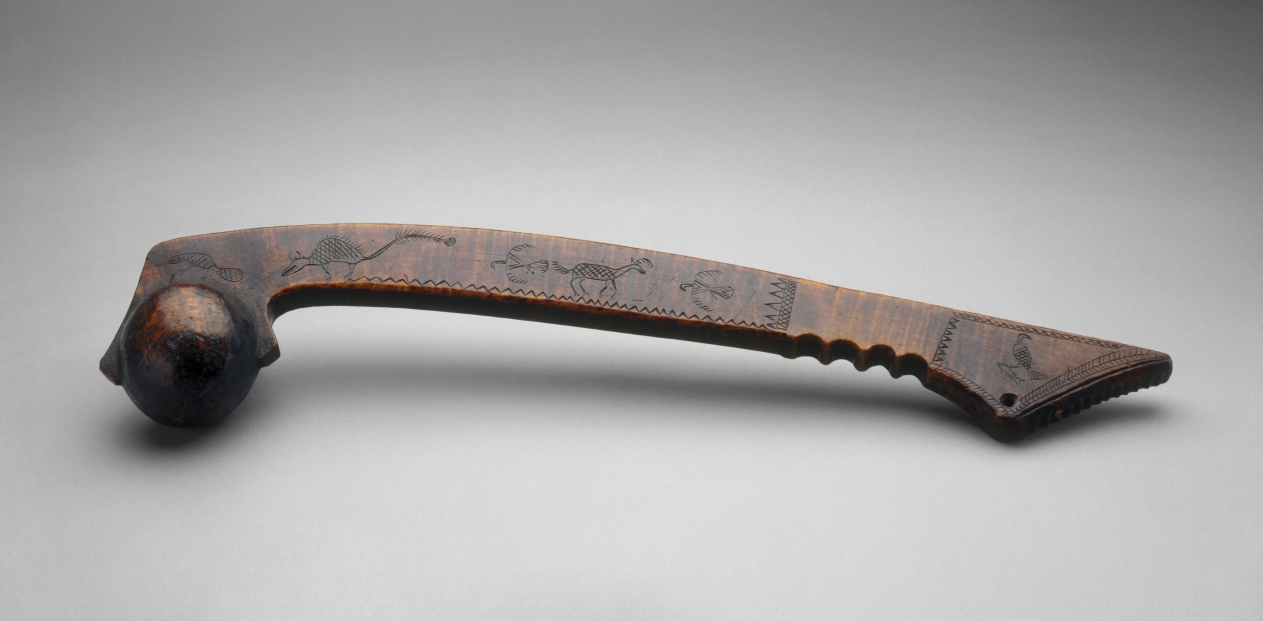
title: Ball-Headed War Club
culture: Native North America, Northeastern Woodlands, Great Lakes, Anishinaabe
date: late 1700s–early 1800s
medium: wood (maple?)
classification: Implements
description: The ball at the striking end of this club is clenched in an abstract, jawlike form that likely refers to a protector animal who endowed the owner with power. Incised on the shaft is a rich record of doodemag (singular, doodem, “totem”)—animals representing other-than-human progenitors from which Anishinaabe peoples trace their descent. (The Anishinaabeg, a group of related Great Lakes nations, include the Odawa, Ojibwe, Potawatomi, and others.) Included is an antlered creature, perhaps a caribou, along with mammals, birds, and powerful spirit beings: the thunderbird, its wings outstretched, and perhaps the long-tailed underwater panther. When this example was made, clubs had become symbols of status and earlier ways of life, having been replaced as favored weapons by metal tomahawks and European firearms. Today, clubs are part of powwow regalia.